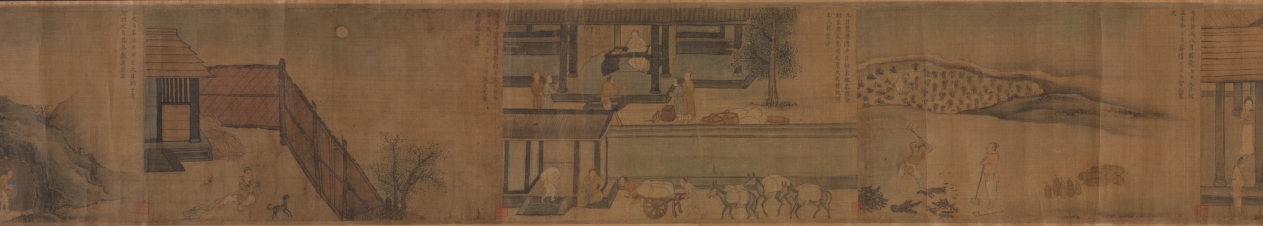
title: "Seventh Month" from the Odes of Bin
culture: China, Southern Song dynasty (1127-1279)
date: 1200s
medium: Handscroll; ink and color on silk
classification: Painting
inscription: Colophons: 1. [on the frontispiece] by the Qianlong emperor (dated 1741). 2. by Lu Wan (dated Zhengde dingchou, 1517). 2. by the Jiaqing emperor (dated 1807).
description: According to Confucian thought, the ruler looks after the well-being of his people which involves agricultural activities. Seventh Month from the ancient Odes of Bin in the Shijing (Book of Poetry) describes occupations throughout the year, including plowing, harvesting, hunting, making clothes, and observing rituals. The earliest illustrations of these Odes accompanied by text were commissioned by Southern Song emperor Gaozong (reigned 1127–1162). As the lower Yangzi delta had become the new seat of government, Gaozong had sets of these illustrations produced by court artists to revive the dynasty and convince the Confucian officialelite of his legitimacy to rule.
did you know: The Odes of Bin appears in the classic Shijing (Book of Poetry), an anthology of more than 300 poems, folk songs, and ceremonial hymns that were originally chanted to music.